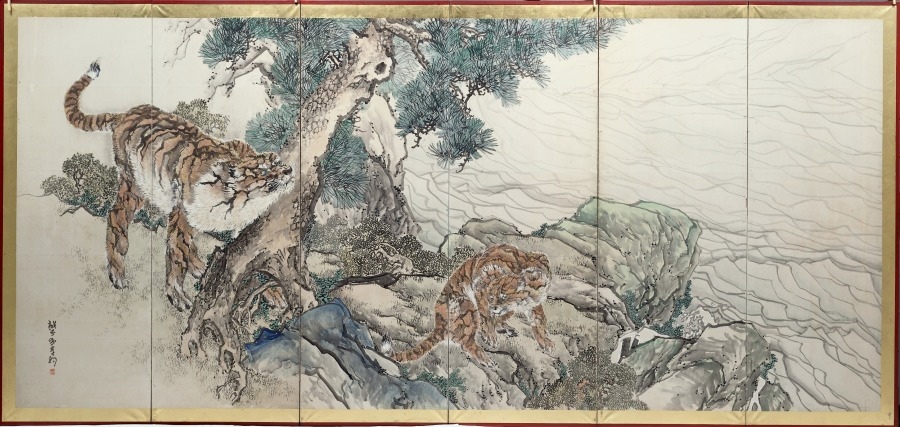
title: Tiger Family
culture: Japan, Edo period (1615–1868)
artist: Kishi Ganku (Japanese, 1749/56–1838)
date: early 1800s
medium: One of a pair of six-panel folding screens; ink and color on paper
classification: Painting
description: By the time this self-taught painter reached his thirties, his paintings were keenly sought after by Kyoto’s sophisticated patrons, including members of the imperial family. Judging from the surviving works, his supporters delighted in the colorful, auspicious imagery of Chinese historical figures, blossoming plum trees, cranes, peacocks, roosters, and especially tigers. Kishi Ganku was originally from the coastal town of Kanazawa, but relocated to Kyoto to work for the Arisugawa family. His work incorporates stylistic elements from the Kano school, the Maruyama school, and works by the Chinese artist Shen Nanping (1682–1760).